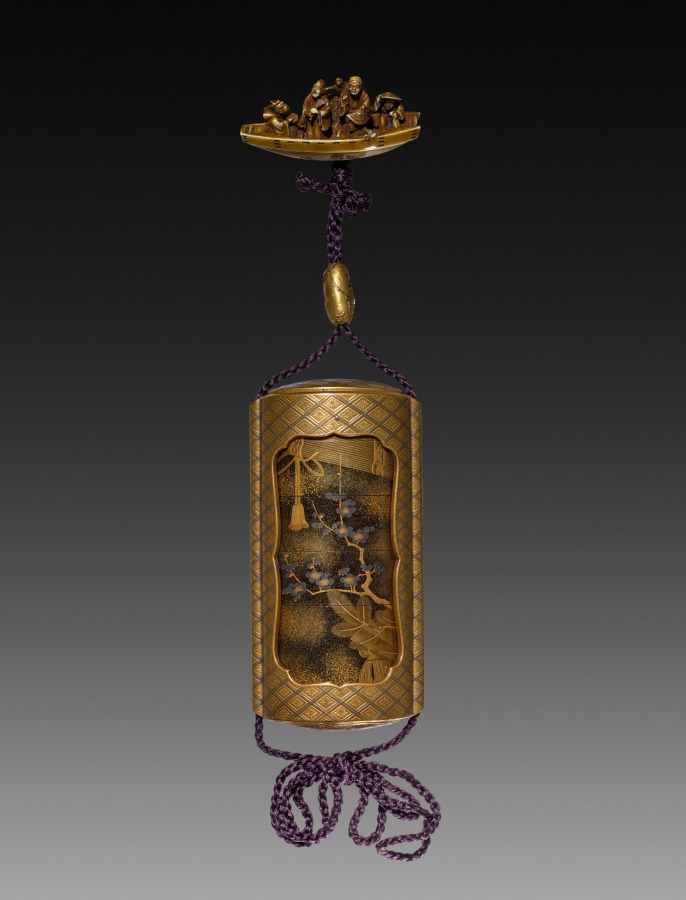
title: Inro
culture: Japan, Edo period (1615–1868)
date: late 1700s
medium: lacquer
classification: Lacquer